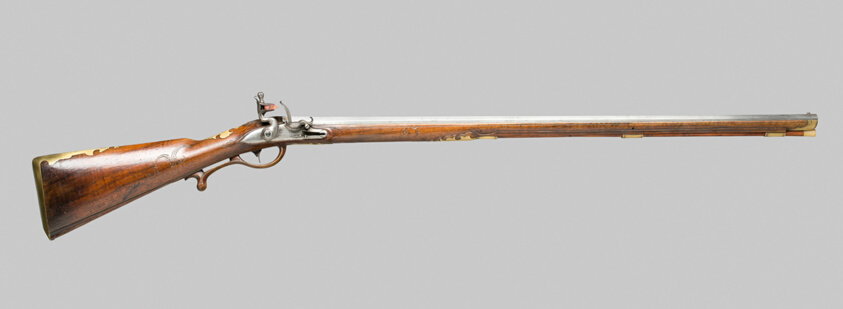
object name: Arms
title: Flintlock Fowling Gun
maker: Lock: Karl Starek; Austria, Vienna, active 1764-85; Barrel: Giovanni Battista Iocussi. Pistoia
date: c. 1770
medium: Walnut and brass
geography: Germany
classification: firearm-long gun; arms; arms and armor